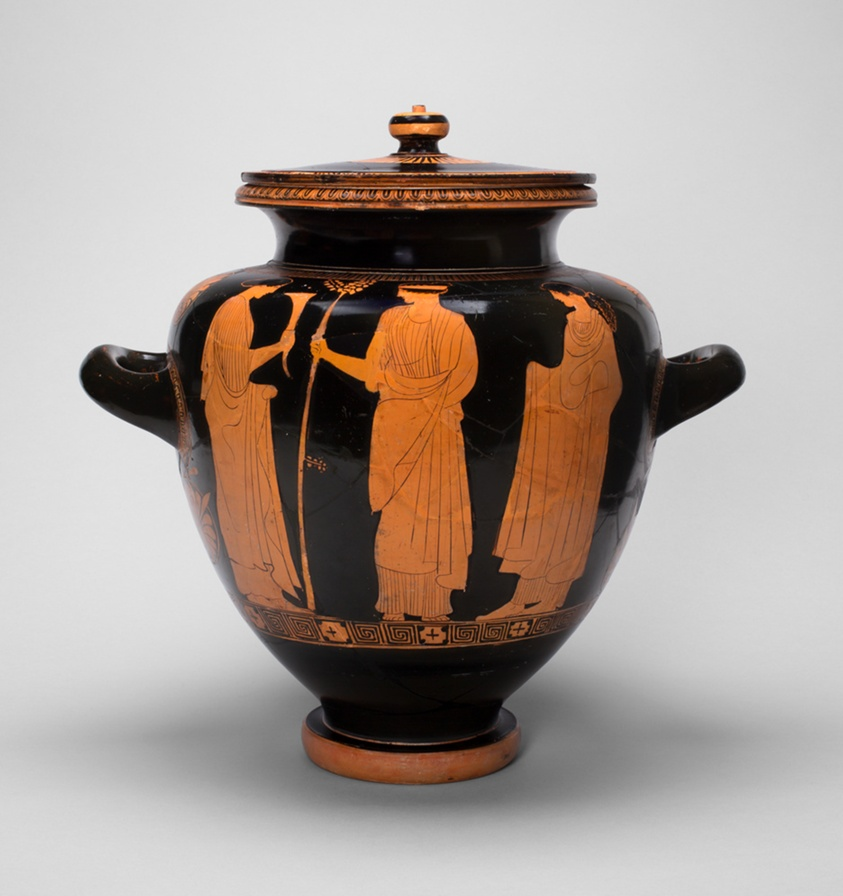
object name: Vessel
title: Stamnos (Mixing Jar)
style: high classical, Classical, attic, red-figure, ancient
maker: Attributed to the Chicago Painter; Greek; Athens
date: about 450 BCE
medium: terracotta, red-figure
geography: Athens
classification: vessel; earthenware; ceramics; ancient art; container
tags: drinking, dining, women, human figures, Greek, females, festivals, female figures, daily life, men, chairs, Greece, cups, interiors